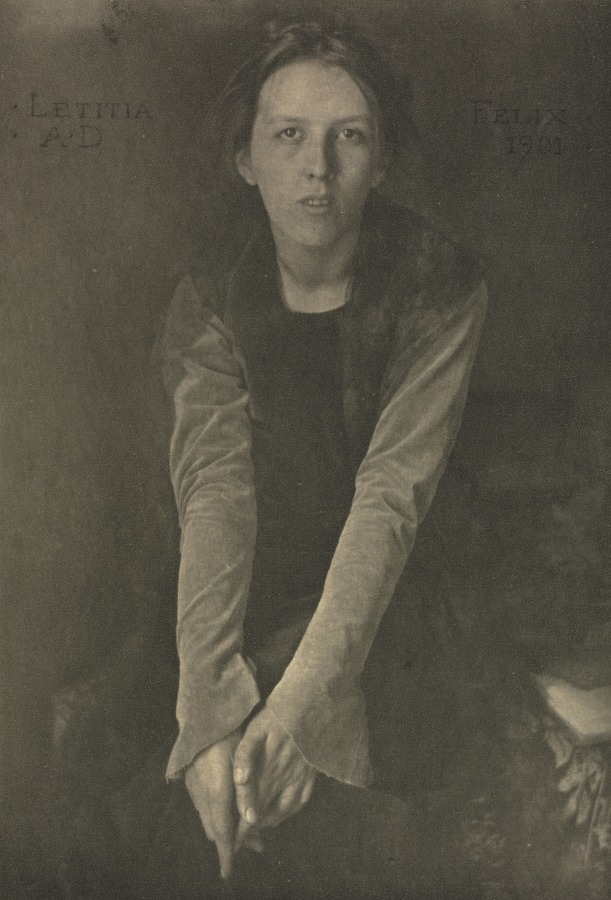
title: Camera Work: Letitia Felix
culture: America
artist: Clarence H. White (American, 1871–1925)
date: 1903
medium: photogravure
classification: Bound Volume